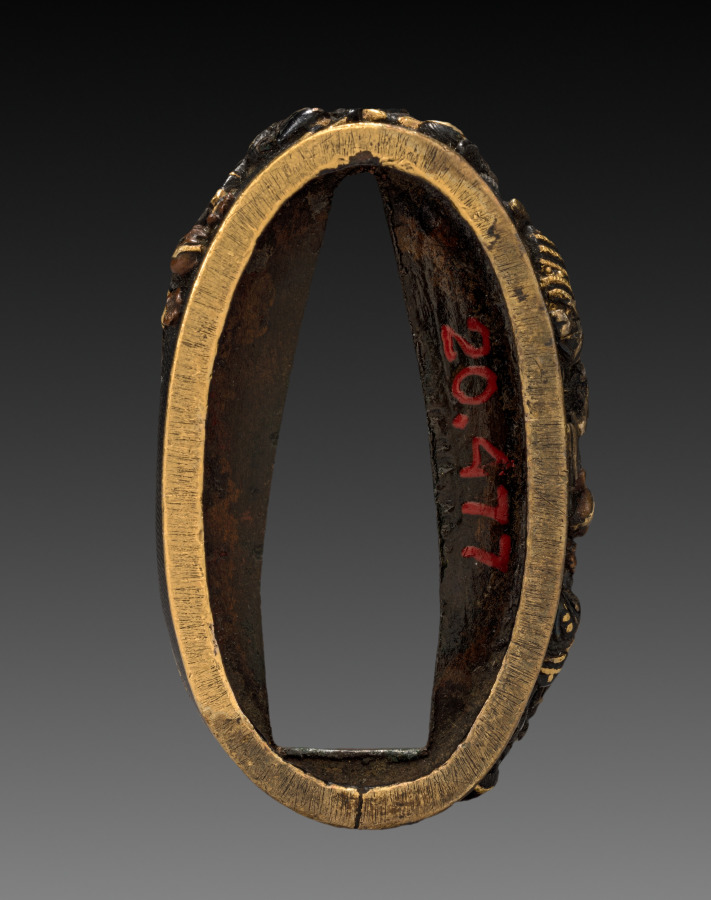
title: Sword-Hilt Collar (Fuchi)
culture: Japan, Edo period (1615–1868)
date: 1700–1850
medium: shakudo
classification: Arms and Armor